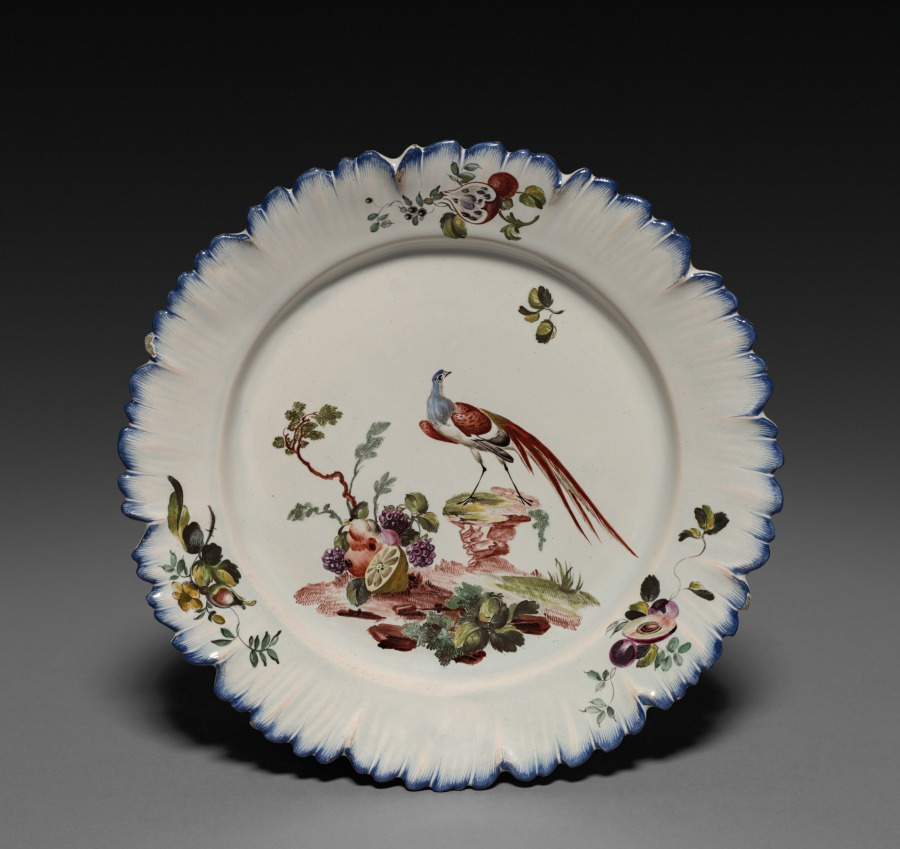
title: Plate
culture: France, 18th century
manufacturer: Sceaux Factory (French, active 1748–66)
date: c. 1770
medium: faience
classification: Ceramic